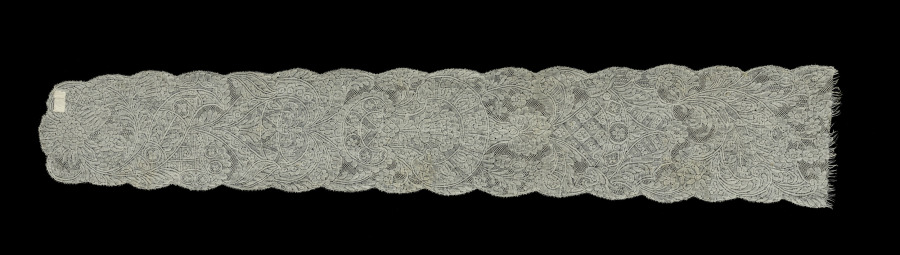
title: Lace Lappet (one of a pair)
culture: Belgium, Binche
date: 1740–60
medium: Linen: bobbin lace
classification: Lace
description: This lace edging depicts shepherdesses, lambs, and flowering plants.